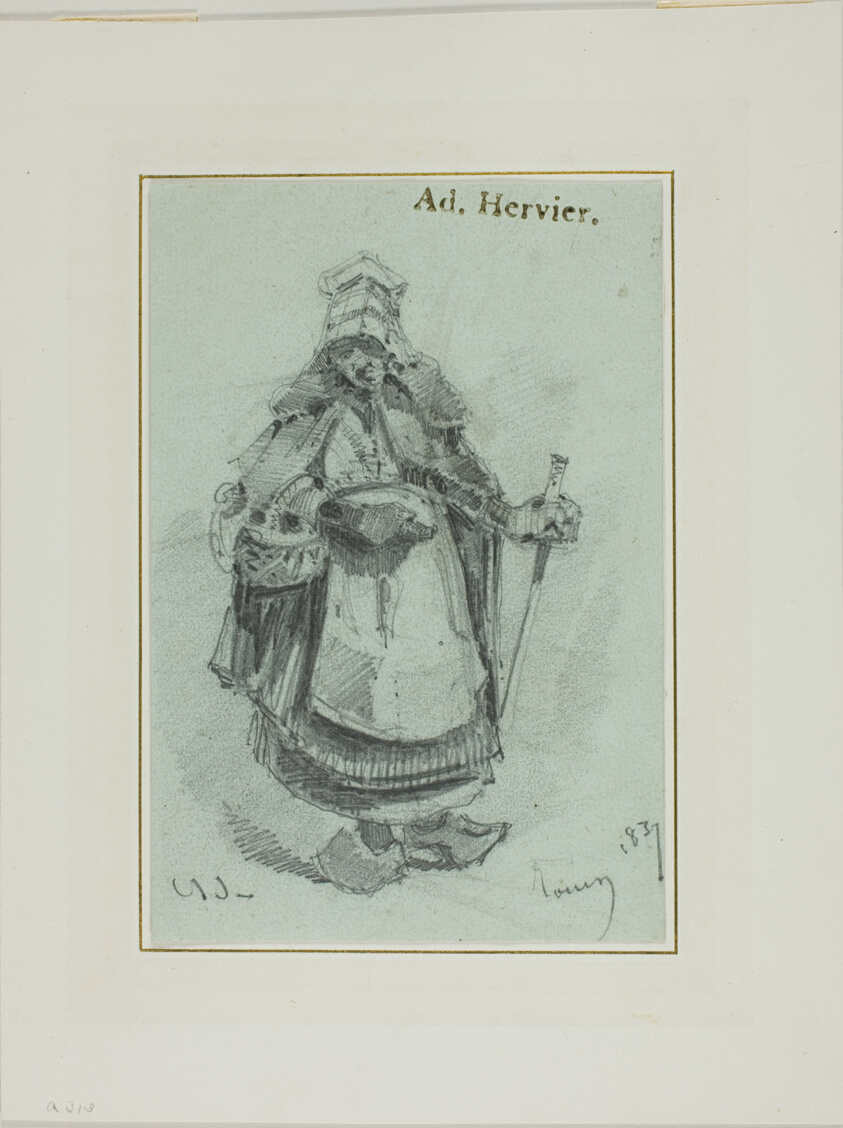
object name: Drawing and Watercolor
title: Peasant Woman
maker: Louis Adolphe Hervier; French, 1818-1879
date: 1837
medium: Graphite on pale green wove paper, adhered at right edge on off-white wove card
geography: France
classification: graphite; drawings (visual works); prints and drawing